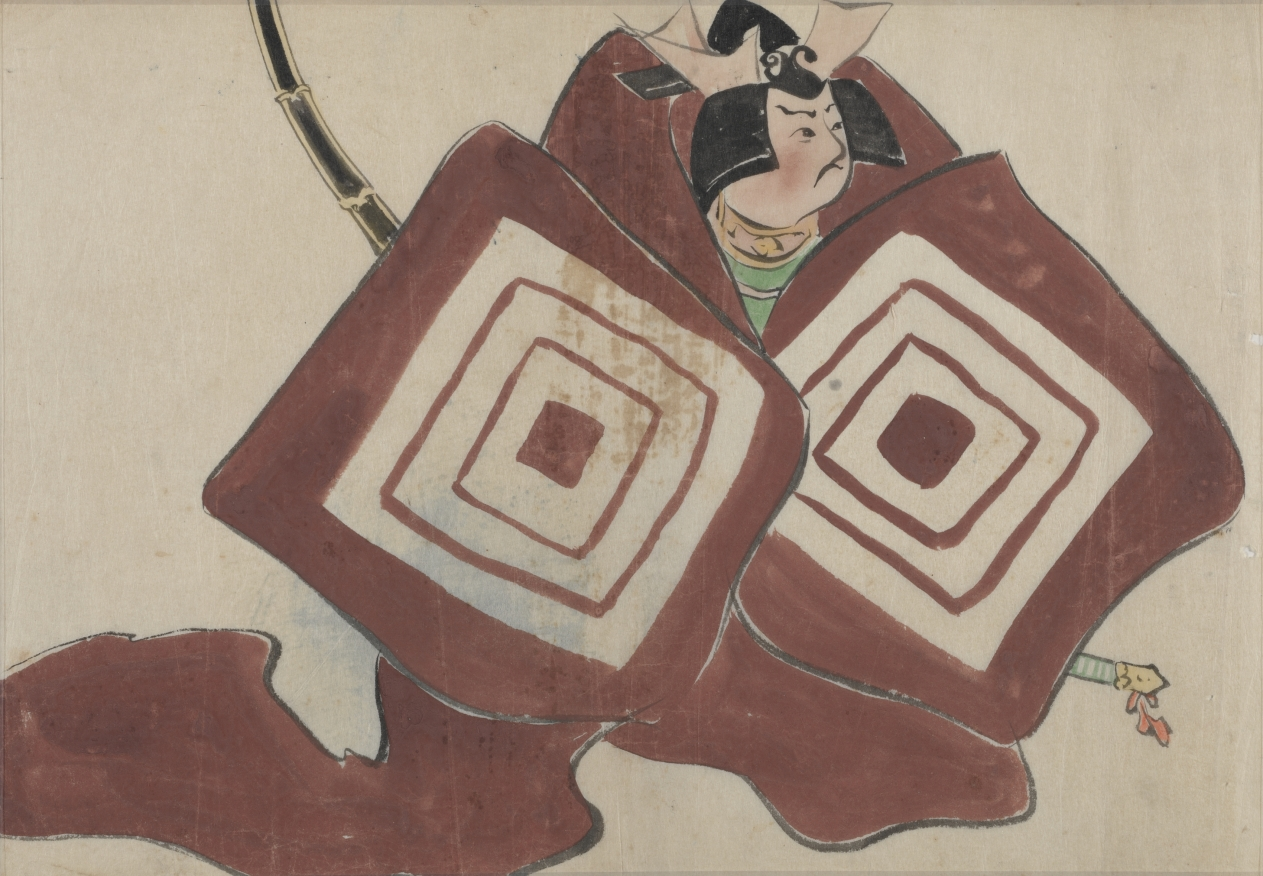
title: Flowers of a Hundred Worlds (Momoyogusa): Shibaraku (Shibaraku)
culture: Japan, Meiji period (1868–1912)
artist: Kamisaka Sekka (Japanese, 1866–1942)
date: 1909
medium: ink and color on paper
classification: Drawing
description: Kamisaka Sekka made preparatory drawings for his Flowers of a Hundred Worlds series on tracing paper with ink and color. The freehand sketches are much looser than the finished, printed compositions.